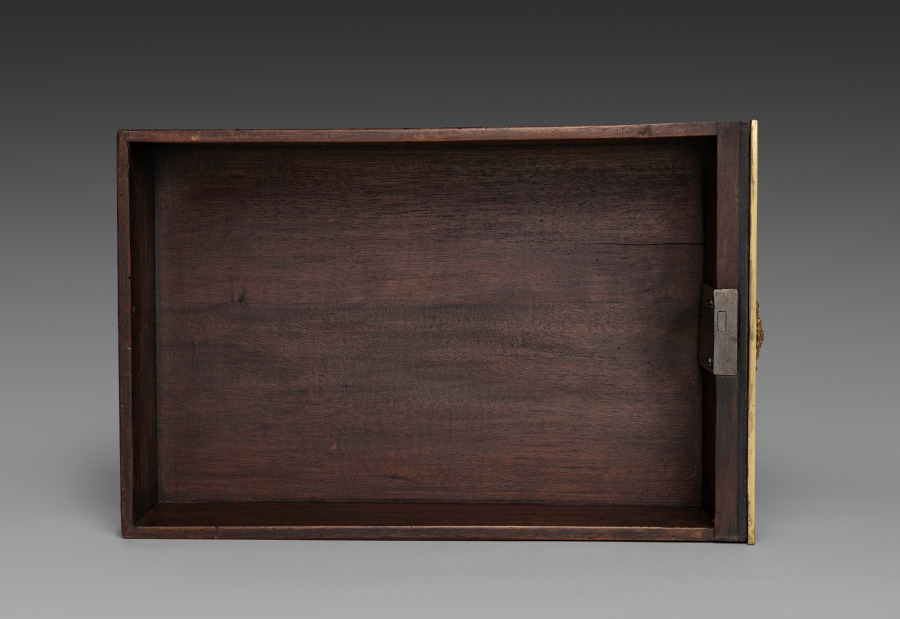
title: Side Drawer for Cabinet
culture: France, late 17th Century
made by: André-Charles Boulle (French, 1642–1732)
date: c. 1690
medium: ebony, marquetry in metal and tortoise shell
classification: Furniture and woodwork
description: Appointed cabinetmaker to King Louis XIV in 1672, André-Charles Boulle became a master of furniture making in France during the late 1600s until his death in 1732. Known primarily for his use of marquetry, in which metal patterns are inlaid into tortoiseshell then applied within the veneered surface of the furniture, Boulle established a level of quality and craftsmanship few others could achieve. As a result, his work found favor at the royal court and among other aristocrats and diplomats eager to impress the king. The inclusion of a medallion depicting Louis XIV within the bronze decoration of this chest would have identified the owner with the royal court. Often exhibiting stout architectural proportions with elegant groups of inlaid motifs such as the parrot on the central panel of this chest, Boulle’s designs are an example of the intellectual fashion for contrasting ideas, materials, and motifs.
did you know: Originally designed to sit atop an elaborate tall stand, this chest was likely altered in the late 1700s to reduce its scale and height.